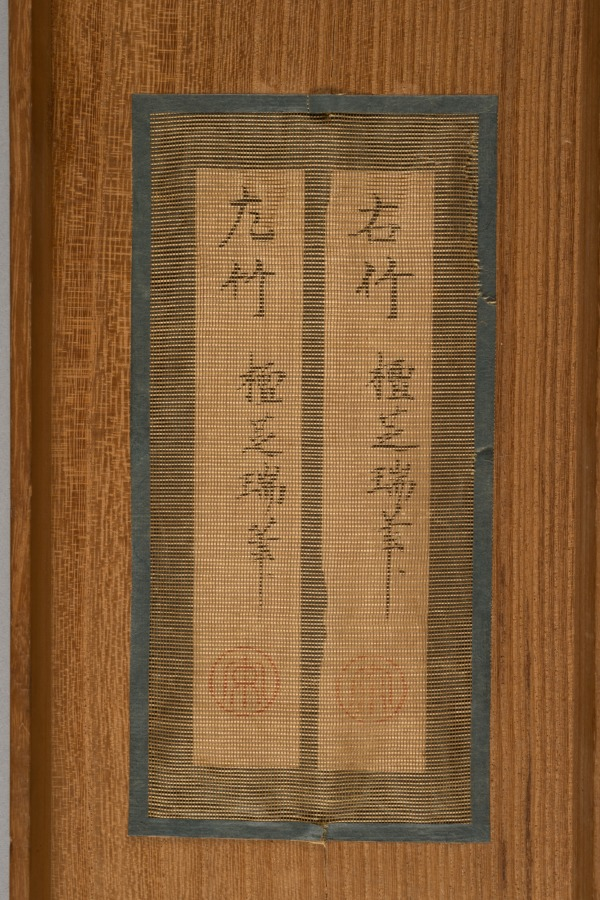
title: Bamboo in Rain; Bamboo in Wind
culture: Japan, Muromachi period (1392–1573)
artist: Genga (Japanese)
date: early 1500s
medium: hanging scroll; ink on silk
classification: Painting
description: East Asian paintings from China, Korea, and Japan were frequently conceived as sets of multiple images. These sets might have been composed for specific palace or temple rooms, or to portray a specific theme, such as the four seasons. Over time, the original intent of such sets is often lost through damage, changes in ownership, or a variety of other reasons. The identity of the artist can also be lost, but then, sometimes, retrieved. This pair of ink paintings has traditionally been labeled as Japanese and attributed to the 16th-century painter Genga. Since there are no seals or signature of the artist on the painting, this attribution was based on comparisons of brush style with paintings known to be by Genga. More recent study indicates that while the 16th century is an appropriate time frame for the pair, the precise cultural identity of the artist is not certain after all. The dark, eccentric shapes of the rocks and bamboo clusters and the dramatic tonal contrasts evident throughout the composition point to either Korean authorship or influence upon a Japanese painter of the period.